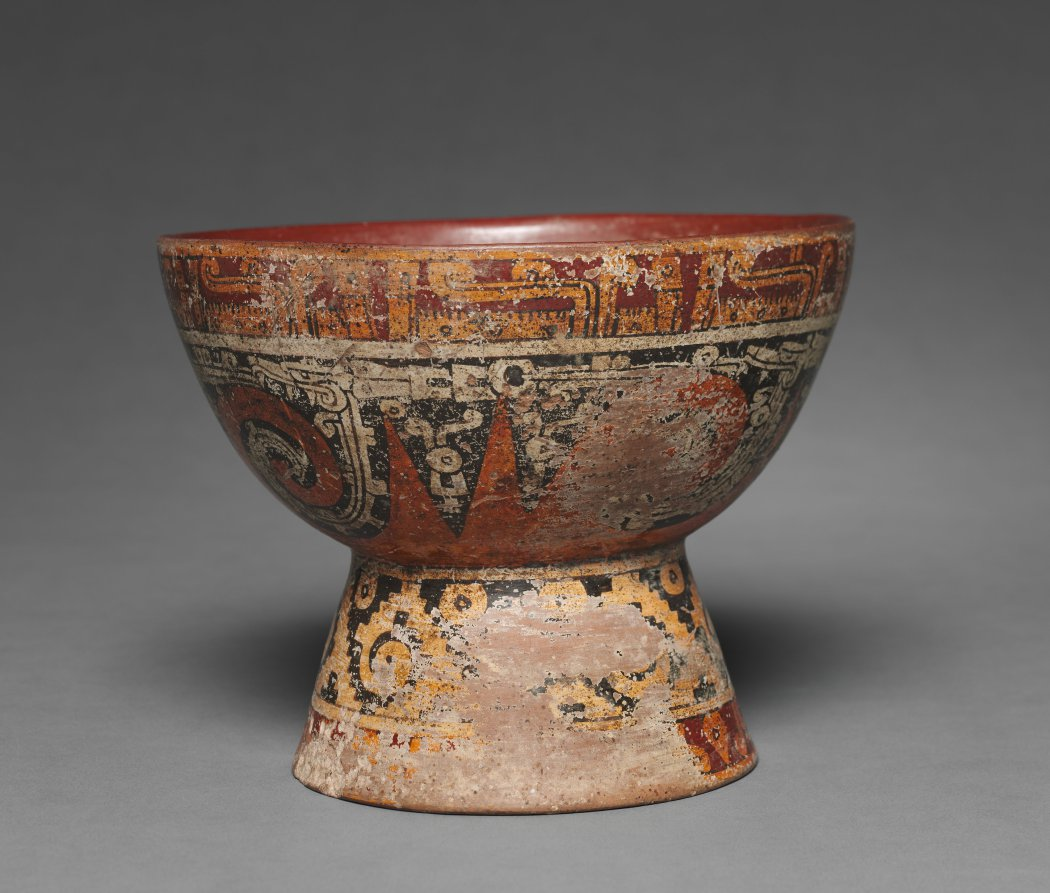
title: Pedestal Bowl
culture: Mexico, Cholula?, Mixteca-Puebla Style, 10th-16th century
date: c. 900–1519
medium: earthenware with colored slips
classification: Ceramic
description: The nobility may have used these goblets for a chocolate beverage or for pulque, made from the fermented sap of the maguey cactus. Both are painted with the precision and brilliant colors for which the Mixteca-Puebla style is renowned, and they carry some of the same motifs, such as the band of stylized animal heads at the top. The smaller bowl has a rattle base.